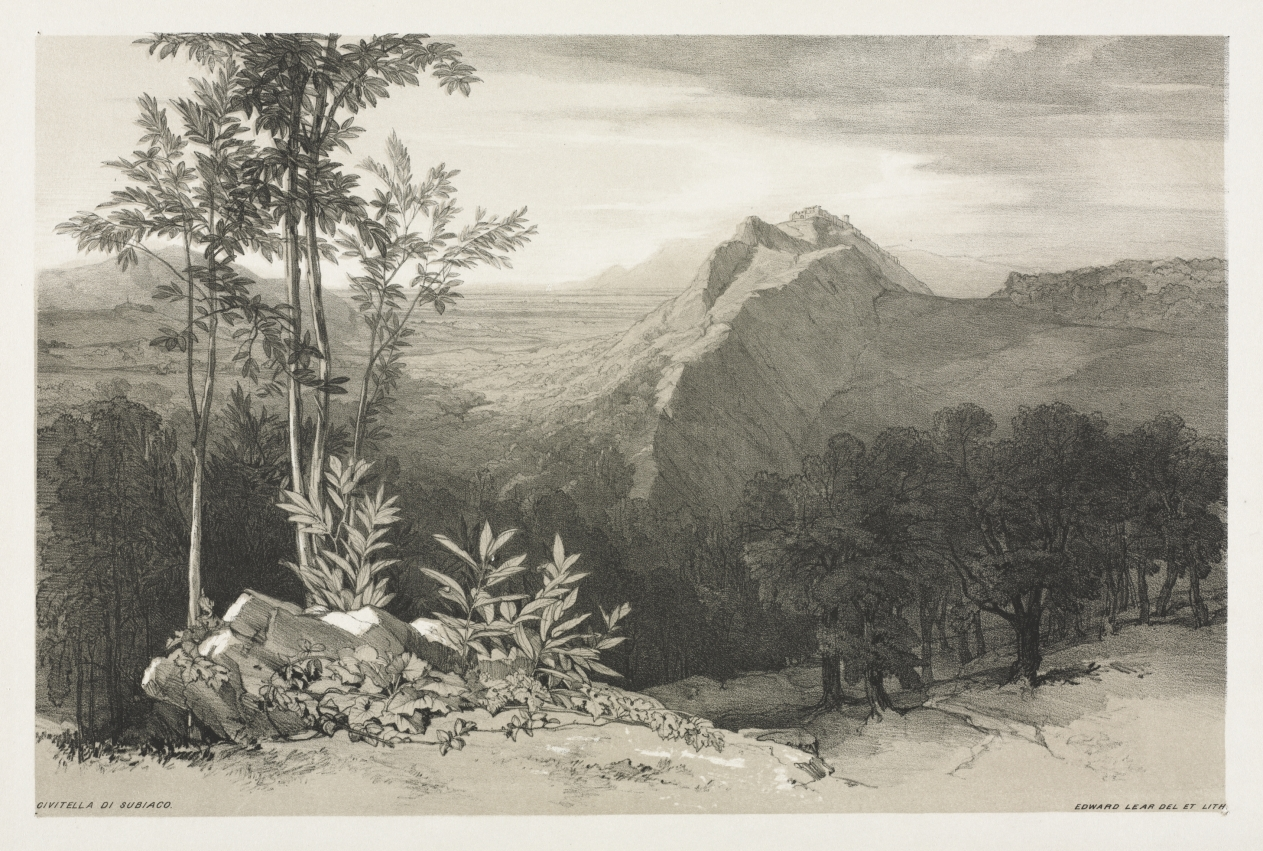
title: Civitella di Subiaco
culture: England, 18th century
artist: Edward Lear (British, 1812–1888)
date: c. 1840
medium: lithograph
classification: Print